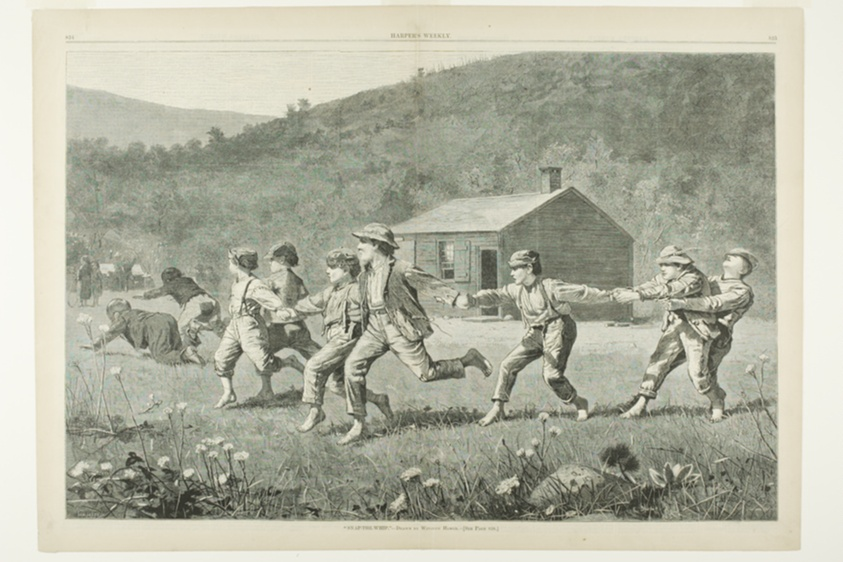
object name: Print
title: "Snap-the-Whip"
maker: Winslow Homer (American, 1836-1910); published by Harper's Weekly (American, 1857-1916)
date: published September 20, 1873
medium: Wood engraving on paper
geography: United States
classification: wood engraving; print; prints and drawing